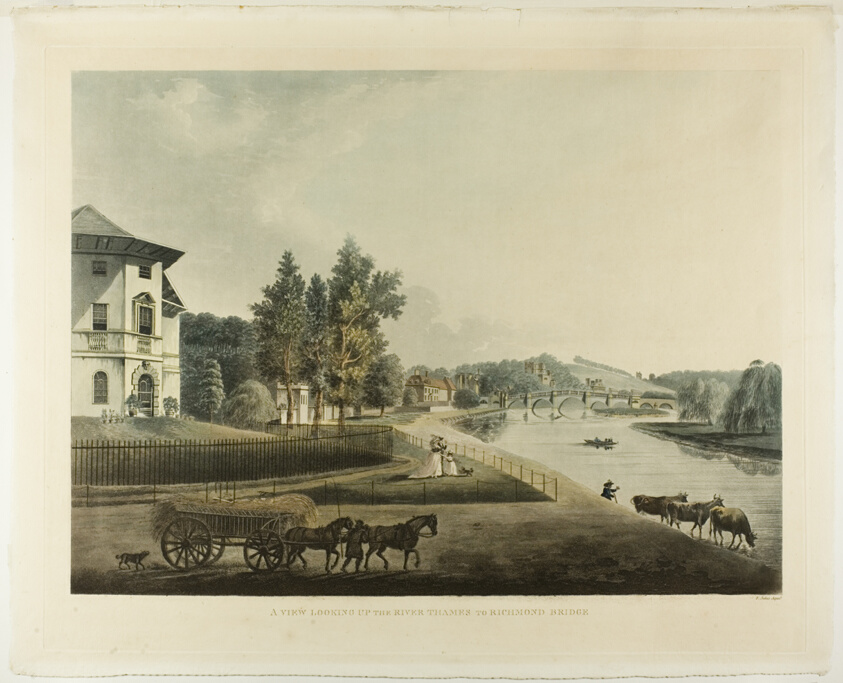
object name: Print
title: A View Looking Up the River Thames to Richmond Bridge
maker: Francis Jukes (English, 1745-1812)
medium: Color aquatint on paper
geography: England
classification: aquatint; print; prints and drawing